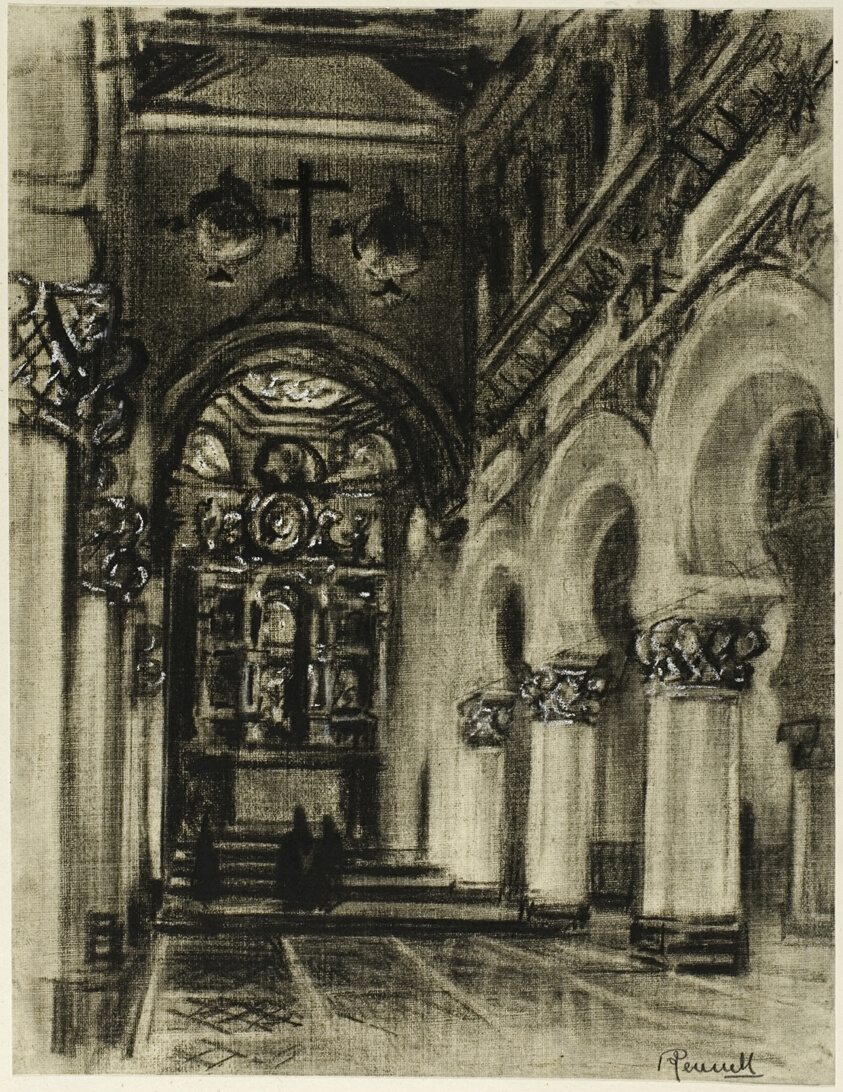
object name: Drawing and Watercolor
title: Santa Maria La Blanca, Toledo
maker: Joseph Pennell (American, 1857-1926)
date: c. 1903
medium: Oiled charcoal with erasing and stumping, heightened with touches of white gouache, on cream wove paper, perimeter mounted on off-white wood pulp laminate board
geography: United States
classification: charcoal; drawings (visual works); prints and drawing